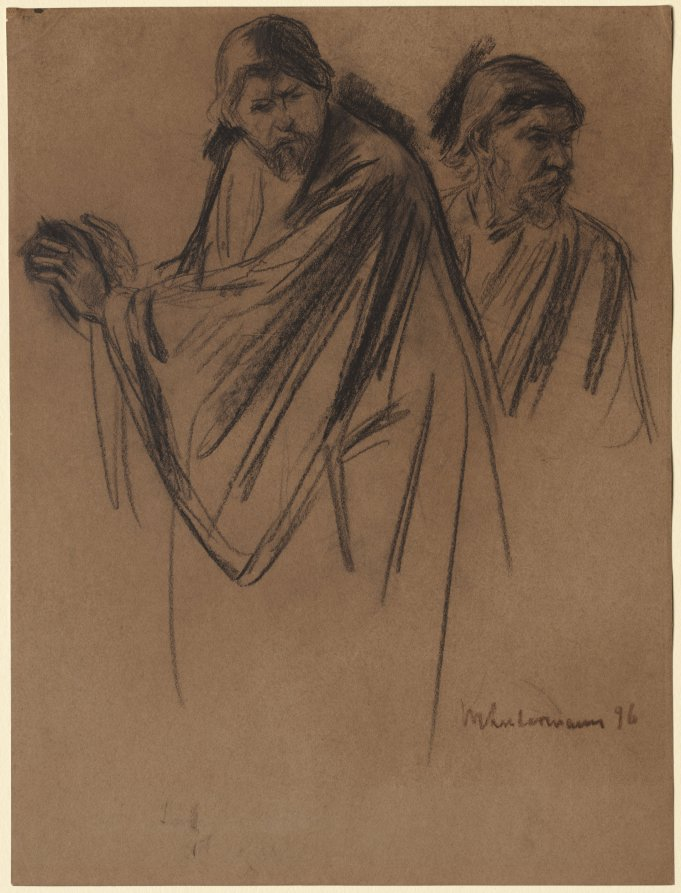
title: Studies for Saint Paul on the Way to Damascus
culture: Germany, 19th century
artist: Max Liebermann (German, 1847–1935)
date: 1896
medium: black chalk or crayon, with stumping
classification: Drawing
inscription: signed, lower right, in brown crayon: MLiebermann 96